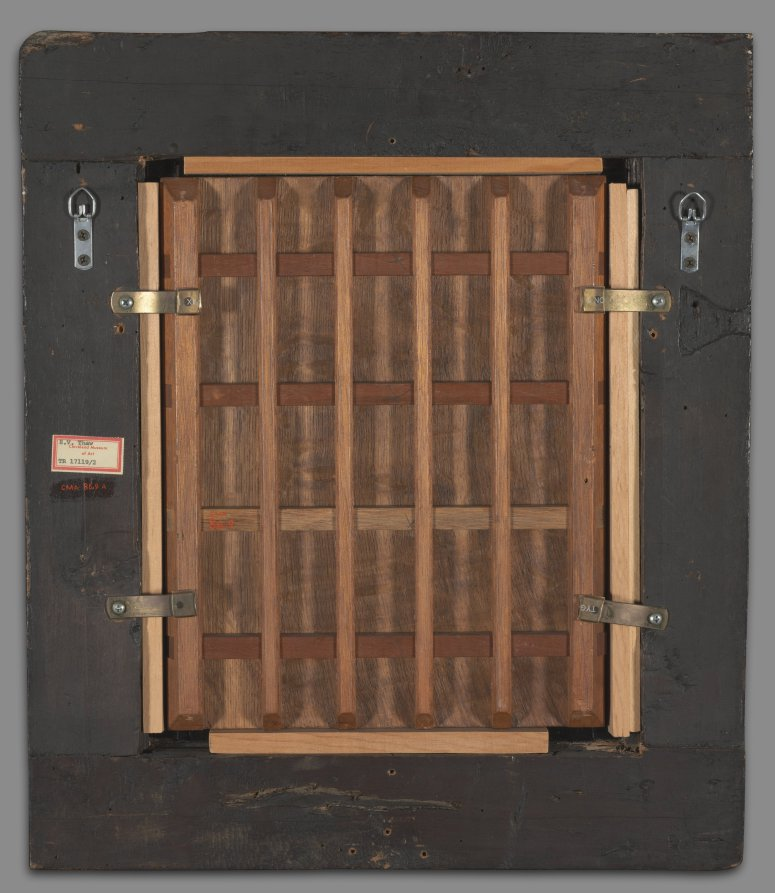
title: Portrait of a Youth as Saint Sebastian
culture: Italy, 15th century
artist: Marco d'Oggiono (Italian, 1460-1524)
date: late 1480s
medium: oil on wood, transferred to pressed wood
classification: Painting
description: Sebastian, a bodyguard for the ancient Roman emperor Diocletian, was shot with arrows and was eventually drowned for his commitment to Christianity. While the arrow alludes to Saint Sebastian, the young man’s clothing dates to the late 1400s, indicating that this is a contemporary portrait, rather than an image of the historical saint. This haunting image was influenced by the paintings of Leonardo da Vinci (1452–1519), particularly in the artist’s use of smoky shadows (called sfumato) to model the flesh. It was painted by Marco d’Oggiono, a Milanese artist who worked in Leonardo’s studio.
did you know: While Marco d'Oggiono made numerous copies of the masterpieces of his teacher Leonardo da Vinci, this is an original composition.